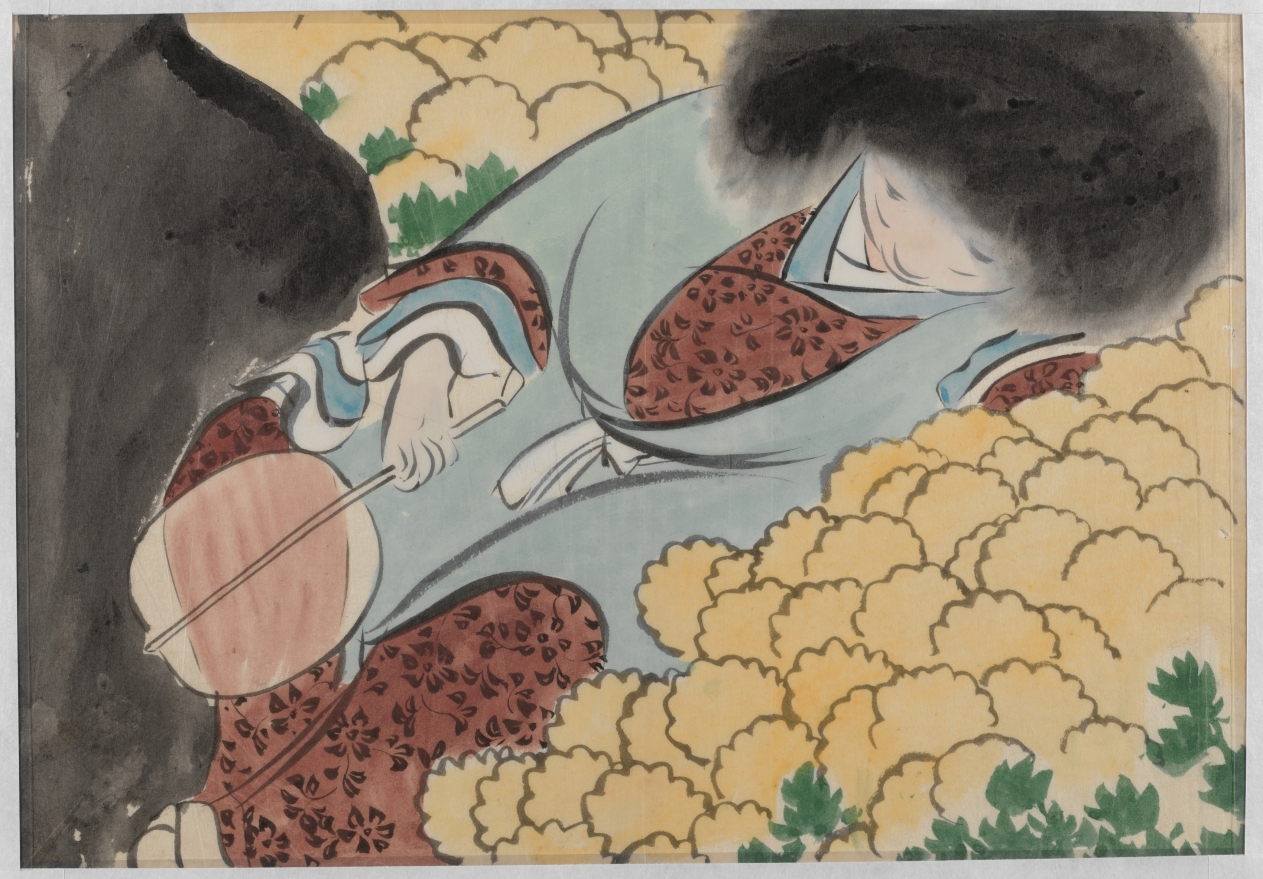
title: Flowers of a Hundred Worlds (Momoyogusa): Chrysanthemum Boy (Kikujidō)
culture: Japan, Meiji period (1868–1912)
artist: Kamisaka Sekka (Japanese, 1866–1942)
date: 1909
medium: ink and color on paper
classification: Drawing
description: Kamisaka Sekka made preparatory drawings for his Flowers of a Hundred Worlds series on tracing paper with ink and color. The freehand sketches are much looser than the finished, printed compositions.